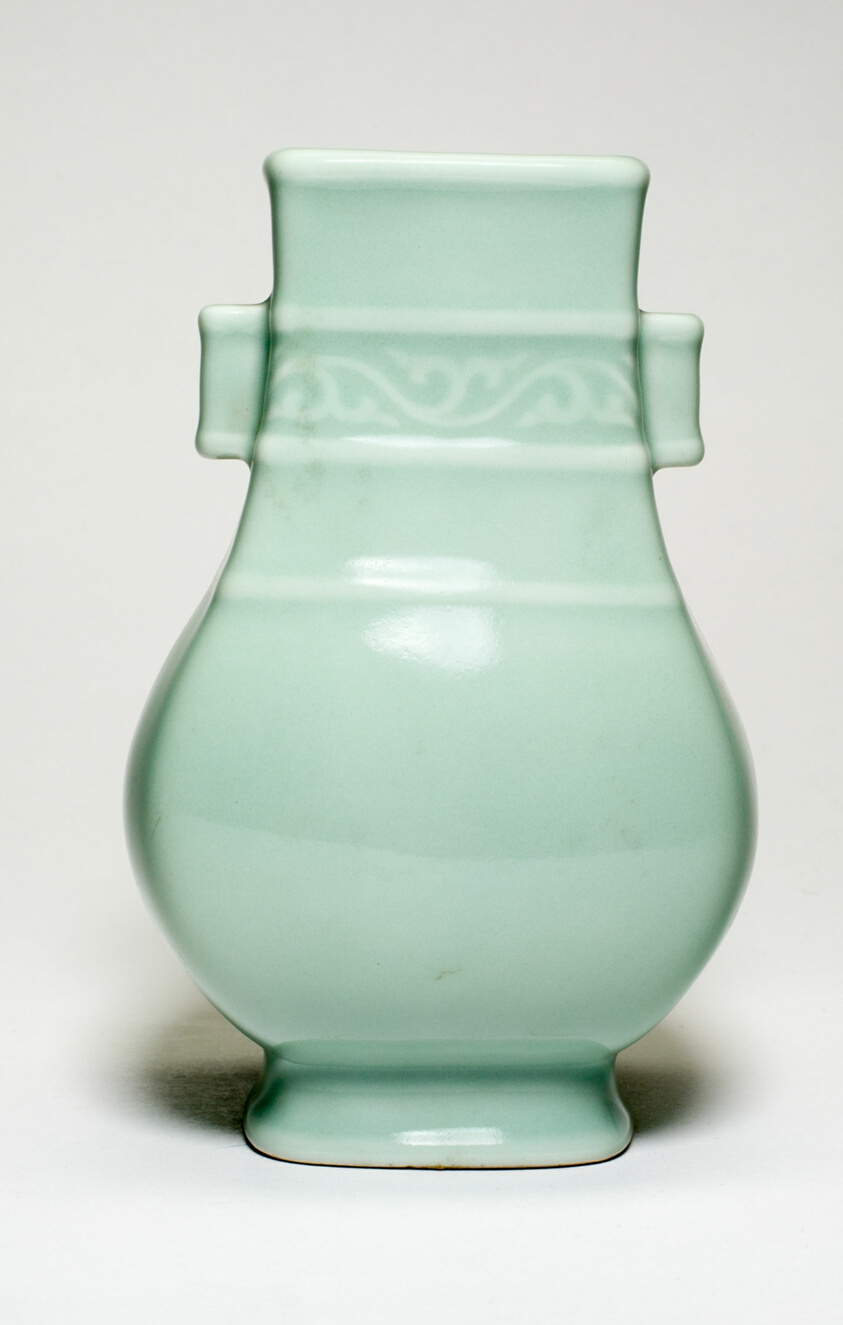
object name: Vessel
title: Vase in the Shape of an Archaic Bronze Vessel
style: Chinese (culture or style)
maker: China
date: Qing dynasty (1644–1911), Qianlong reign mark (1736–1795), 18th/19th century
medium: Celadon-glazed porcelain with underglaze molded decoration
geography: China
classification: vase; porcelain; vessel; asian art; ceramics